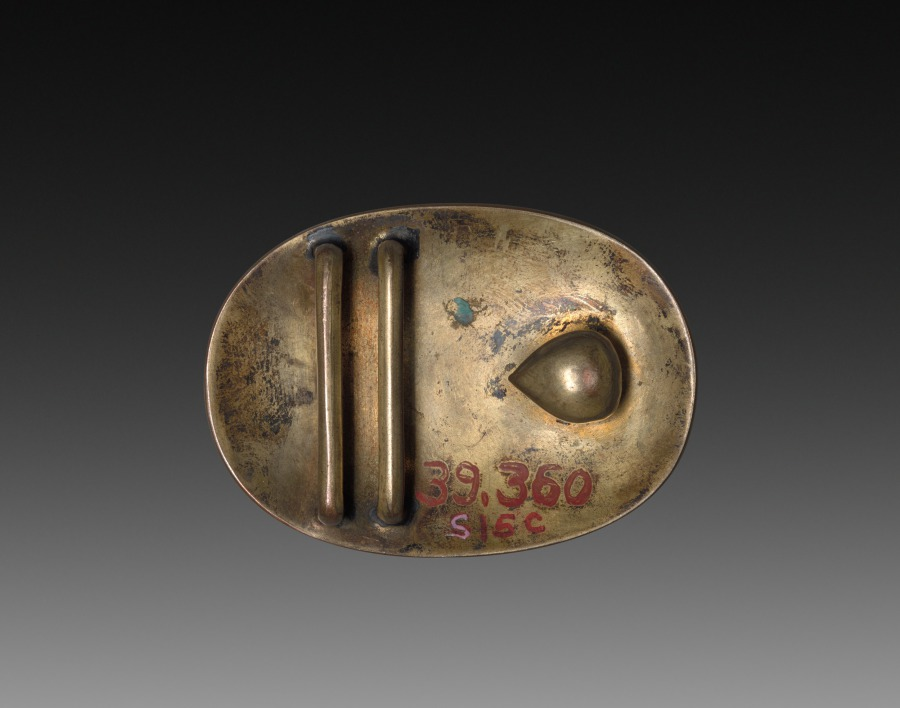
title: Belt Buckle with Crabs and Sea Plant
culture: Japan, Meiji period (1868–1912) or Taishō period (1912–26)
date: early 1900s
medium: cloisonne enamel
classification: Enamel